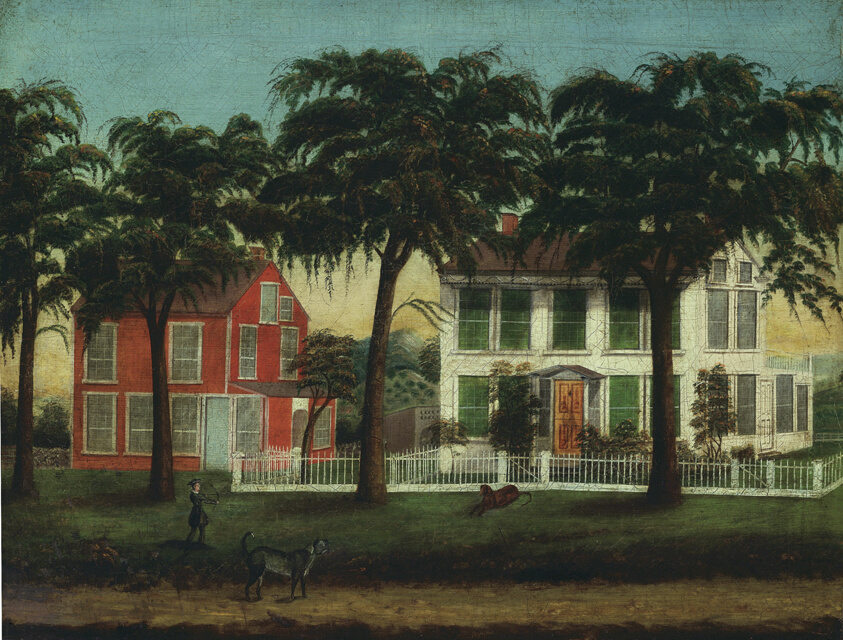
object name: Painting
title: Houses on the Fox River, Illinois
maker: Artist unknown (American, 19th–20th century)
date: 1881–90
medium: Oil on panel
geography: United States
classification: painting; american arts